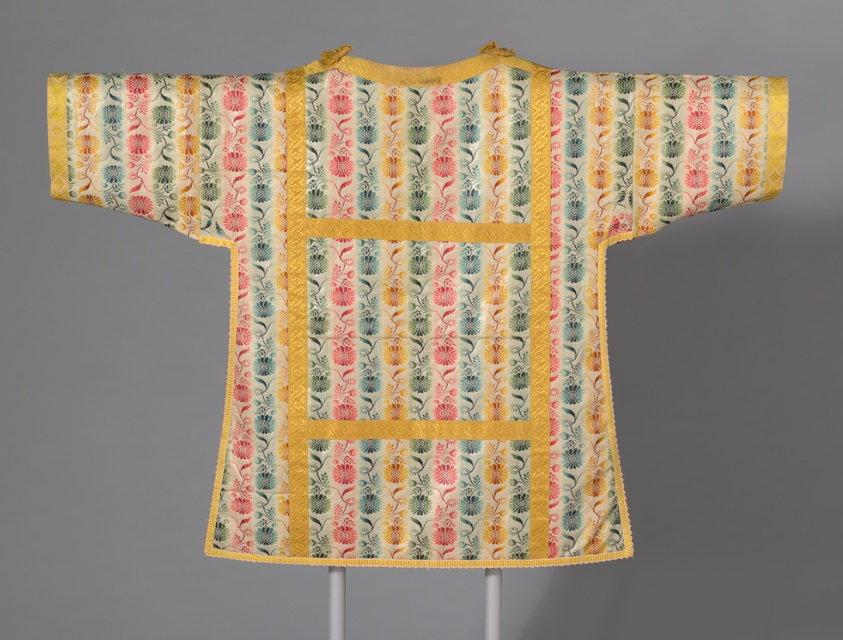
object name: Textile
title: Dalmatic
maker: England, possibly Nottingham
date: Mid–19th century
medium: Wool, plain weave; glazed and calenderized; with wool supplementary patterning wefts; applied woven tape; edged with woven tape with looped weft fringe; applied rosettes; lined with cotton, plain weave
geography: Nottingham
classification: textile; weaving; liturgical